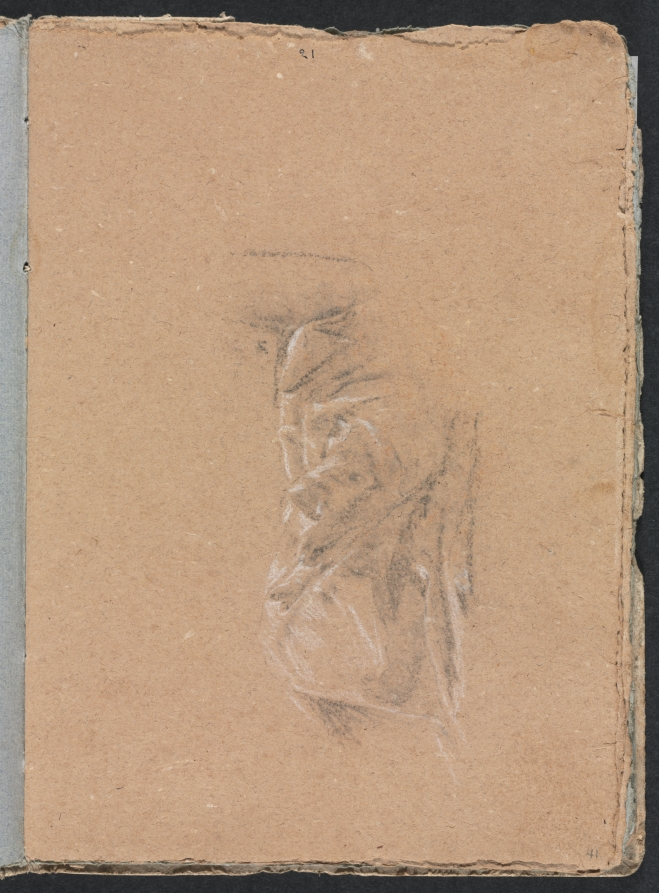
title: Verona Sketchbook: Drapery study (page 41)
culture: Italy, 18th century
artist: Francesco Lorenzi (Italian, 1723–1787)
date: 1760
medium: black chalk with white heightening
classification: Bound Volume